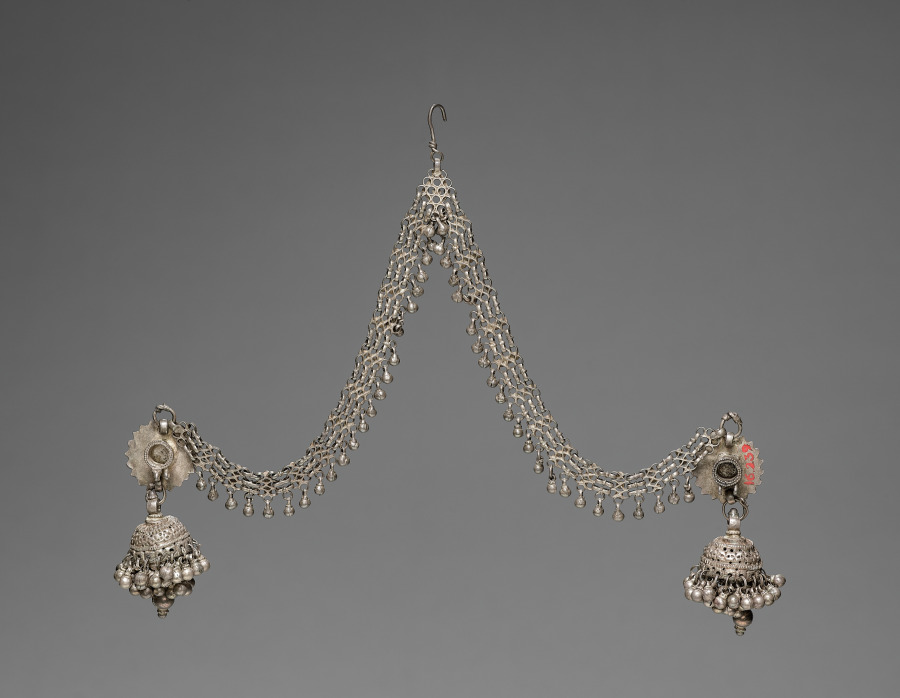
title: Ear Studs and Chains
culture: India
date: 1800s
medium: silver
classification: Jewelry